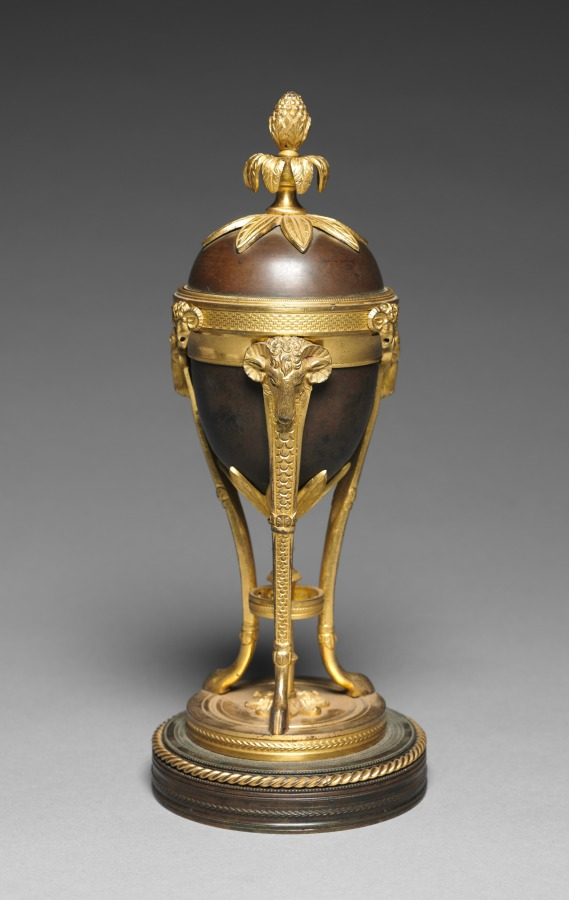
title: Pair of Urn Convertibles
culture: England, late 18th century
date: late 1700s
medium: dark bronze, mounts in ormolu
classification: Furniture and woodwork